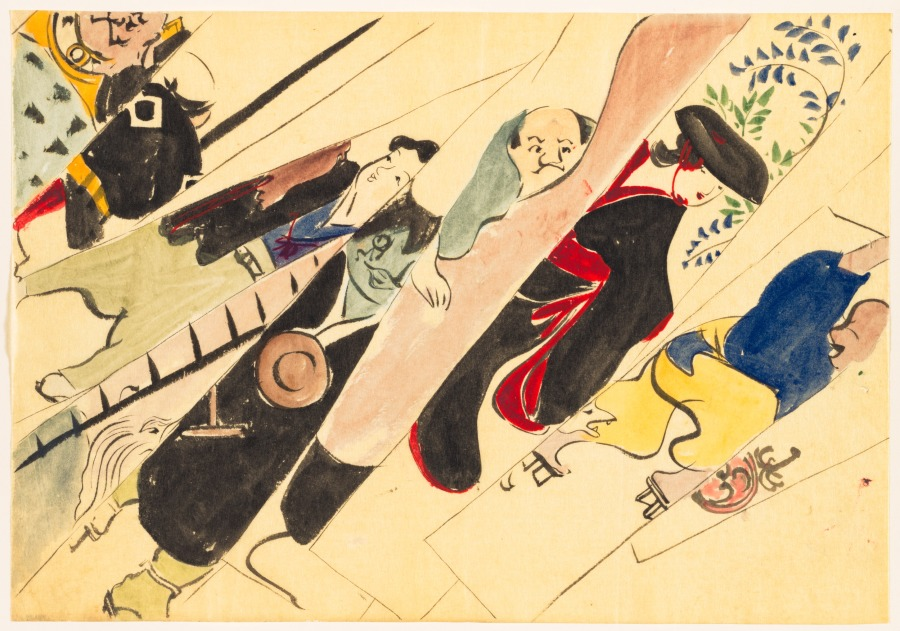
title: Flowers of a Hundred Worlds (Momoyogusa): Otsu-e (Otsu-e)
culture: Japan, Meiji period (1868–1912)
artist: Kamisaka Sekka (Japanese, 1866–1942)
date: 1909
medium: ink and color on paper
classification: Drawing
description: Kamisaka Sekka made preparatory drawings for his Flowers of a Hundred Worlds series on tracing paper with ink and color. The freehand sketches are much looser than the finished, printed compositions.